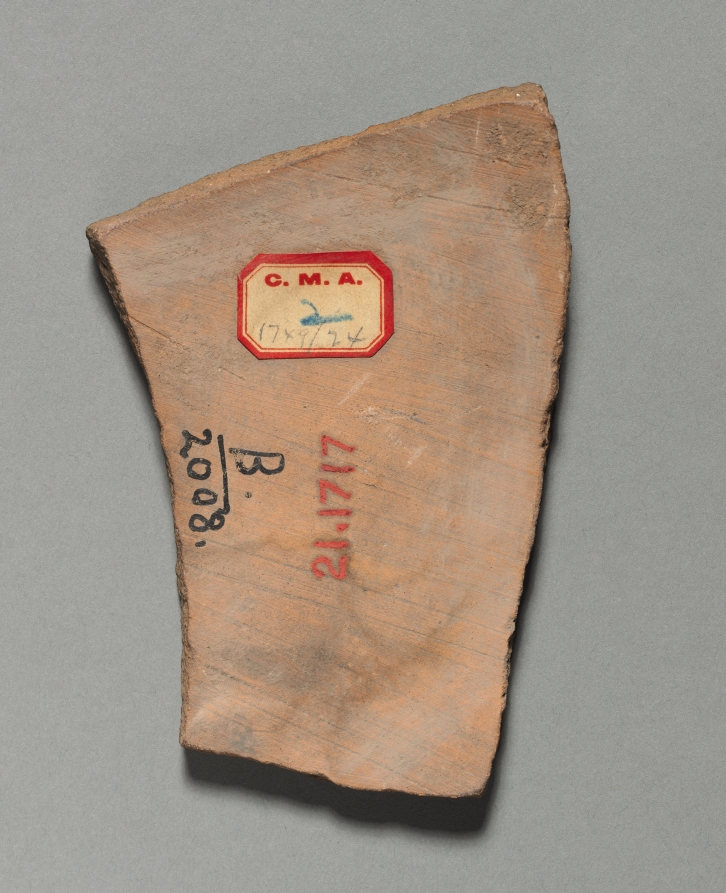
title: Fragment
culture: Peru, Inca, 1400-1532 AD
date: 1400–1532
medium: pottery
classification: Ceramic